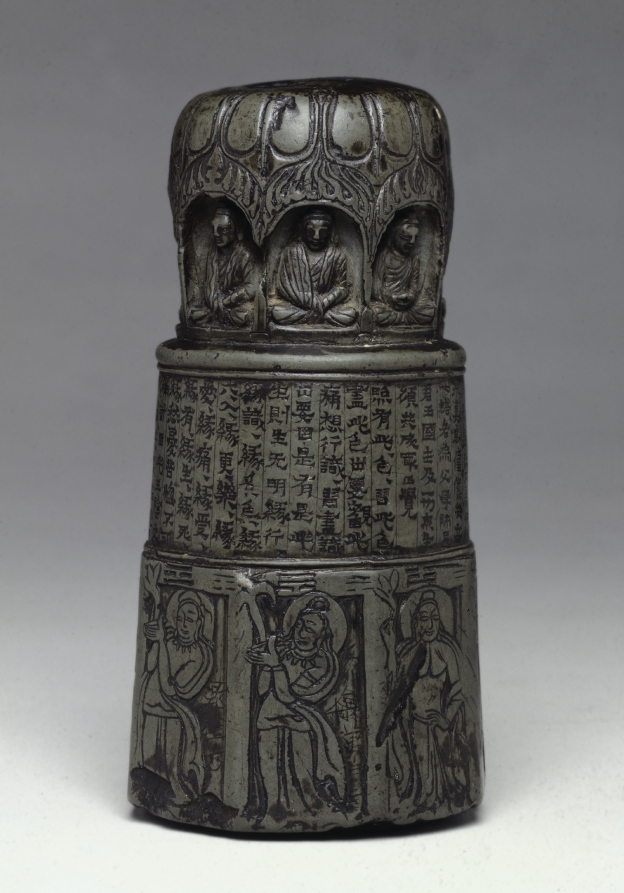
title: Miniature Votive Stupa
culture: China, Gansu province, Northern Wei dynasty (386-534)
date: 435 CE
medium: steatite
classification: Sculpture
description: This sutra pillar, inscribed with a sacred Buddhist text, belongs to a group of miniature stupas (jingta) that were found exclusively in the Gansu corridor, Northwest China. Ranging in date between AD 426–36, some of them bear the names of the lay Buddhist donors who commissioned them. A stupa is an architectural round structure built for the veneration of Buddhist relics. Miniature stupas may have commemorated the visit of a sacred site or represented donations to religious communities and sites.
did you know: There are trigrams, three horizontal lines, broken or continuous, above each of the eight bodhisattvas in the stupa's lower section.